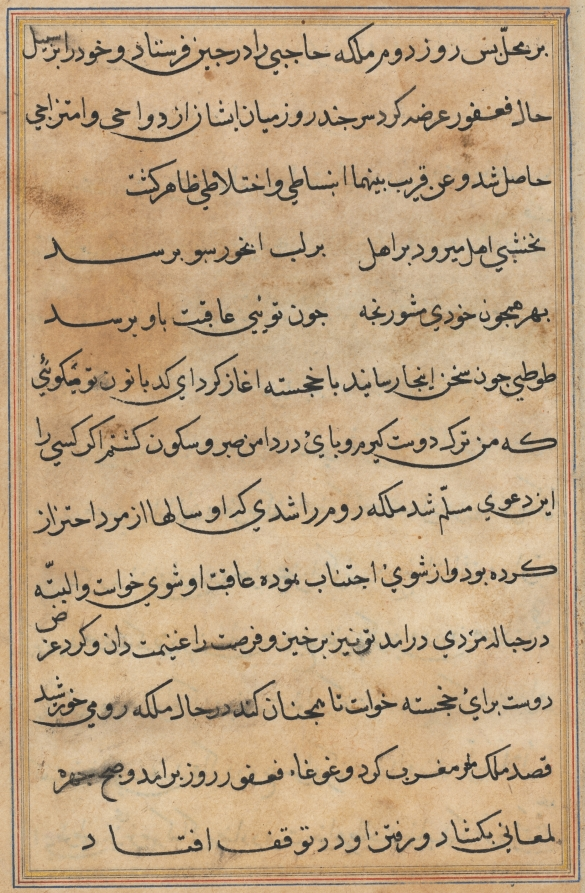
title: Page from Tales of a Parrot (Tuti-nama): text page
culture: Mughal India, court of Akbar (reigned 1556–1605)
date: c. 1560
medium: gum tempera, ink, and gold on paper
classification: Painting